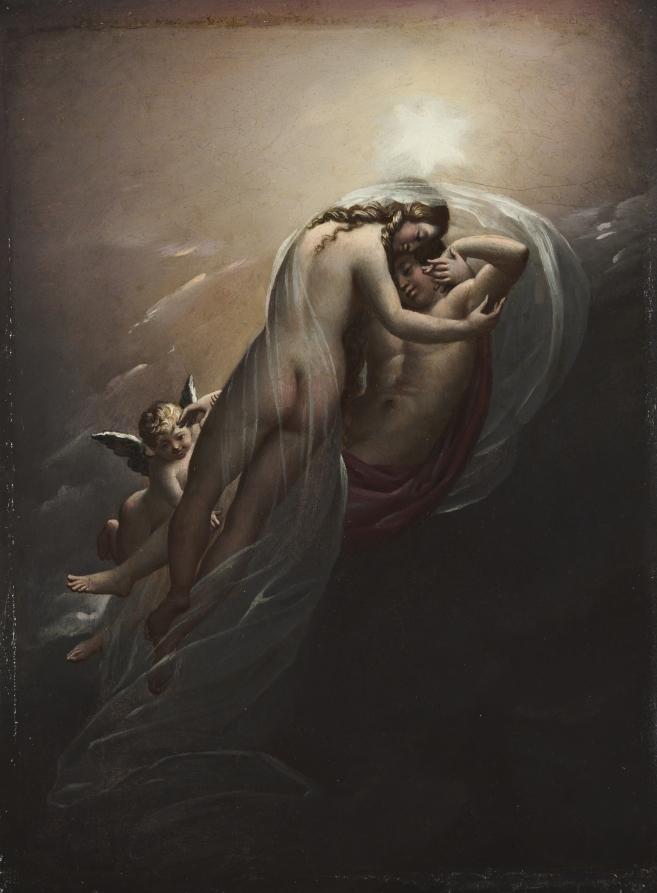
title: Aurora and Cephalus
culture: France, 19th century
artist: Anne-Louis Girodet de Roucy-Trioson (French, 1767–1824)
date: c.1810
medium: oil on canvas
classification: Painting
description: The goddess of the dawn, Aurora, fell in love with the shepherd Cephalus. She eventually seized him at daybreak, bringing him to the heavens while he slept—the scene Girodet has painted here. Later, missing his wife, Procris, Cephalus begs to return. Aurora agrees, giving him a magic spear that kills every target, including his wife, when he mistakes her for an animal in the brush.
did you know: This myth subverts typical gender dynamics: usually a man captures a woman, but in this story the trope reversed.